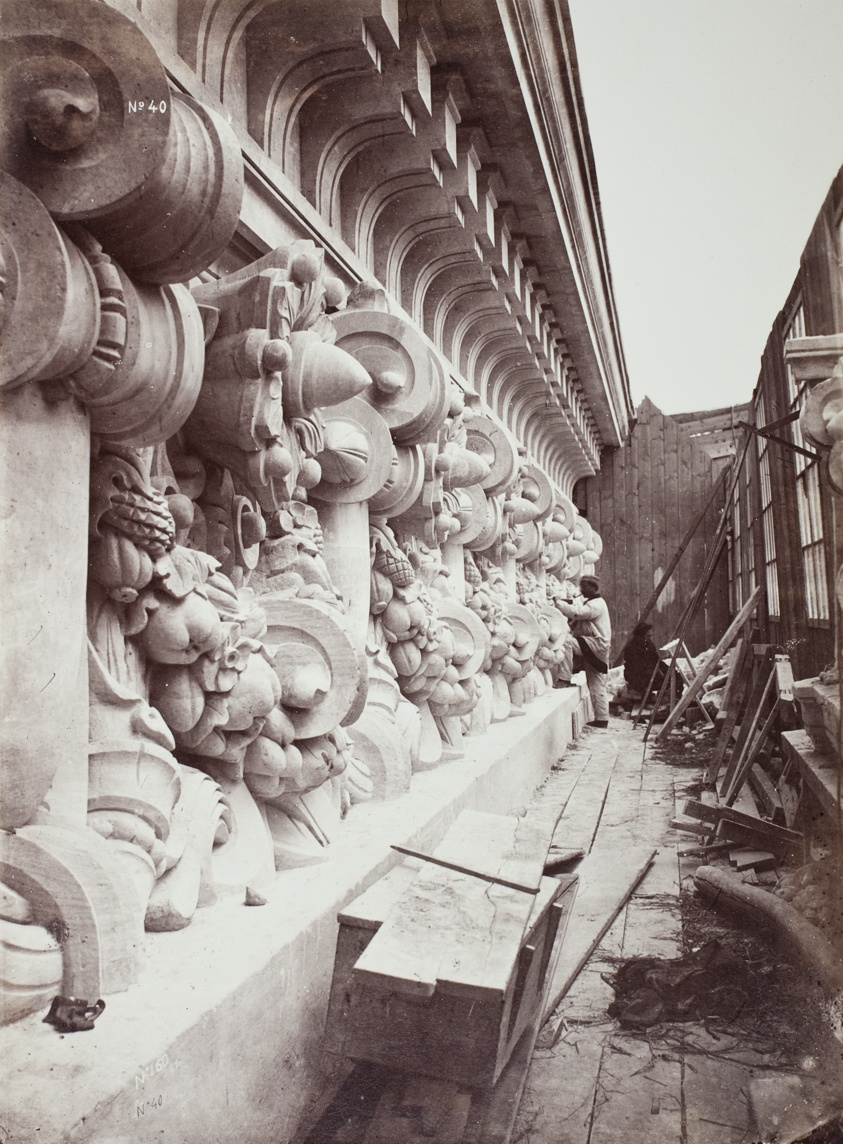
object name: Photograph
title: Stage Frieze and Cornice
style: 19th century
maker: Louis-Emile Durandelle (French, 1839–1917)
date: c. 1870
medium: Albumen print, from "Le nouvel Opéra de Paris, Sculpture ornementale" (1875)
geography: France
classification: photograph; albumen silver print; photography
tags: Paris